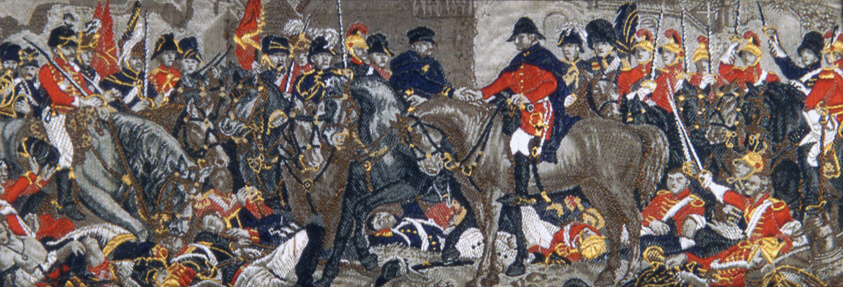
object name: Textile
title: "The Meeting of Wellington & Blucher (Battle of Waterloo)"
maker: Woven by Thomas Stevens (English, 1828–88); Coventry, England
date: 1875/1900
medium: Silk, plain weave with supplementary brocading wefts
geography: Coventry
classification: textile; weaving